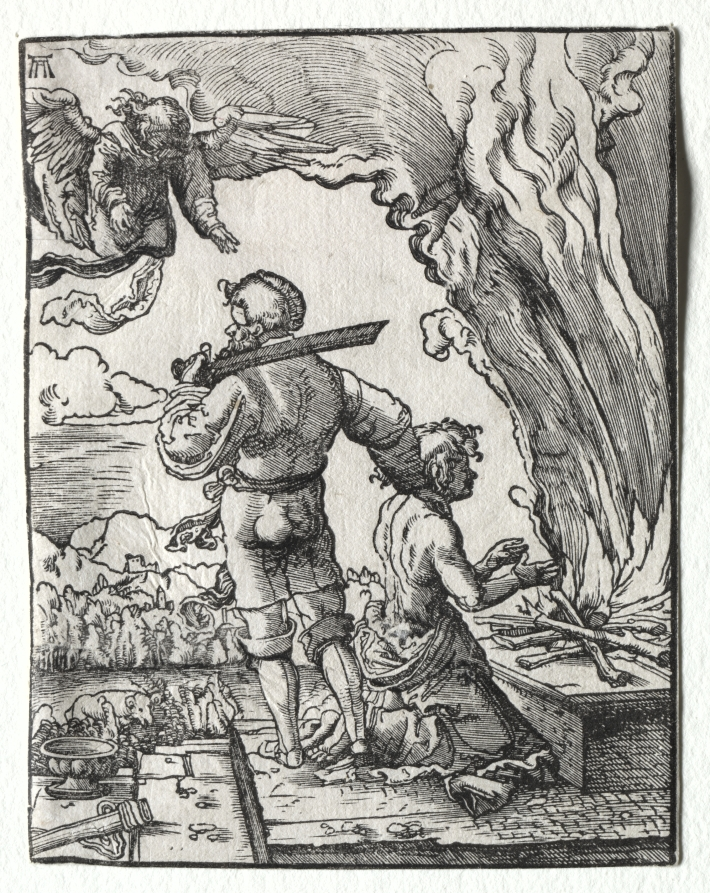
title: Abraham's Sacrifice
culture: Germany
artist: Albrecht Altdorfer (German, c. 1480–1538)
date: c. 1520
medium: woodcut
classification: Print